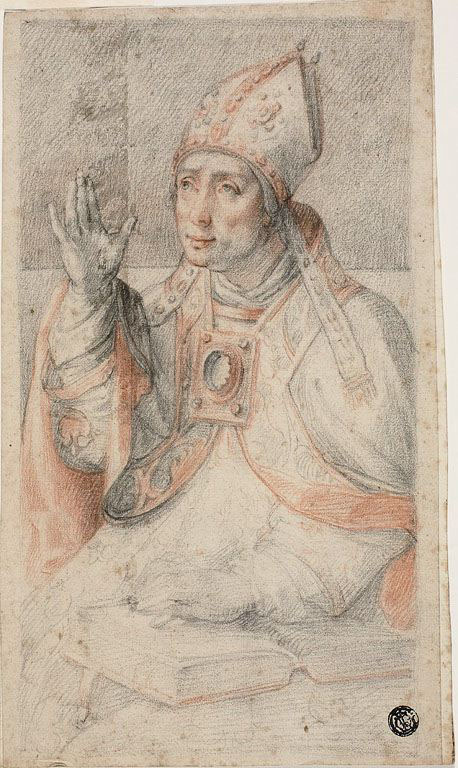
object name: Drawing and Watercolor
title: Saint Augustine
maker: Attributed to Federico Zuccaro; Italian, 1540/41-1609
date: c. 1560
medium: Red and black chalk on ivory laid paper, laid down on ivory laid paper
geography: Italy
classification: chalk; drawings (visual works); prints and drawing